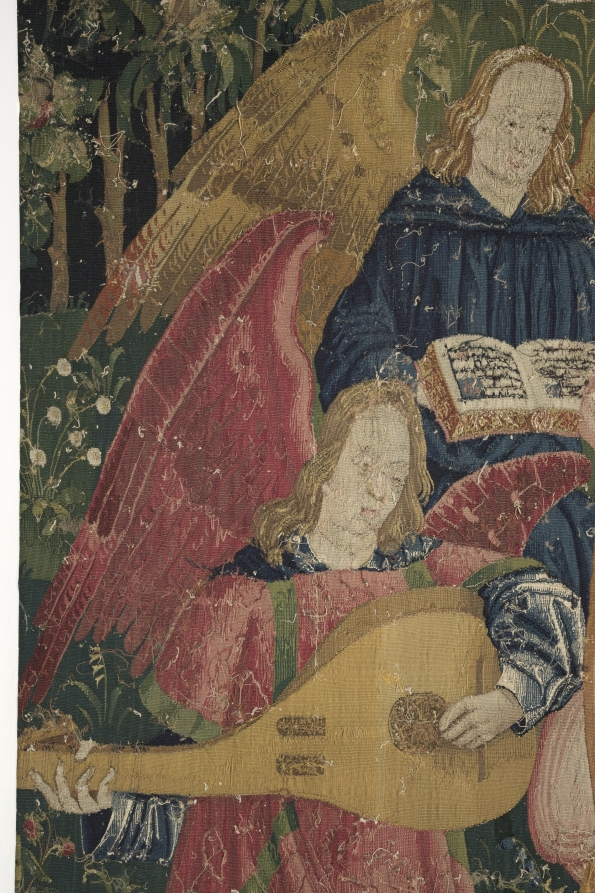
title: The Triumph of Eternity (from Chateau de Chaumont set)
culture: France, Lyon(?), early 16th century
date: 1512–15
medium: silk and wool; tapestry weave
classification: Tapestry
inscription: French verse in Gothic letters translates as follows: "Nothing triumphs by right authority, Unless it be conducted by Eternity. Nothing is permanent beneath the firmament, But above us triumphs Eternity."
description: The Triumph of Eternity is represented by the Coronation of the Virgin. Dressed in crimson velvet with an opulent brocaded velvet shawl, the Virgin is seated in the center as two angels hold a crown over her head. Five musical angels surround her playing an organ, recorder, straight cornetto, harp, and lute, while another sings from an open music book. The scenes in the set display a conservative style in which the figures are placed in shallow landscapes, thereby ignoring pictorial innovations for depicting space and mass. The verse in Old French at the top states: Nothing triumphing by due authority Remains permanent and durable. Nothing is permanent under the heavens, But above, eternity triumphs.